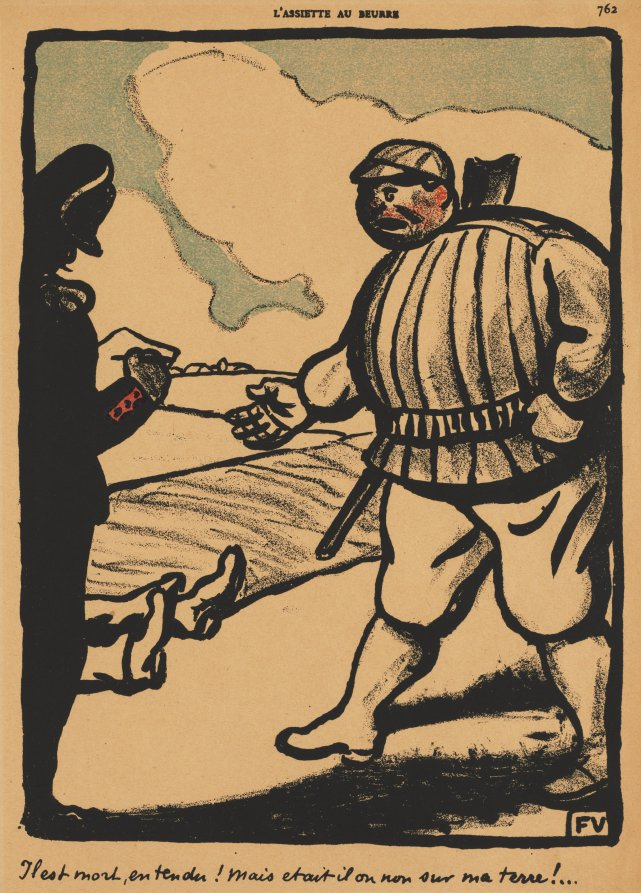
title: All right, so he's dead!...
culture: France, 19th century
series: Crimes and Punishments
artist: Félix Vallotton (Swiss French, 1865–1925)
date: 1901, published 1902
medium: color lithograph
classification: Print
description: This print was published in the magazine L’Assiette au Beurre (March 1, 1902 ) as plate 5 from the series Crimes and Punishments.